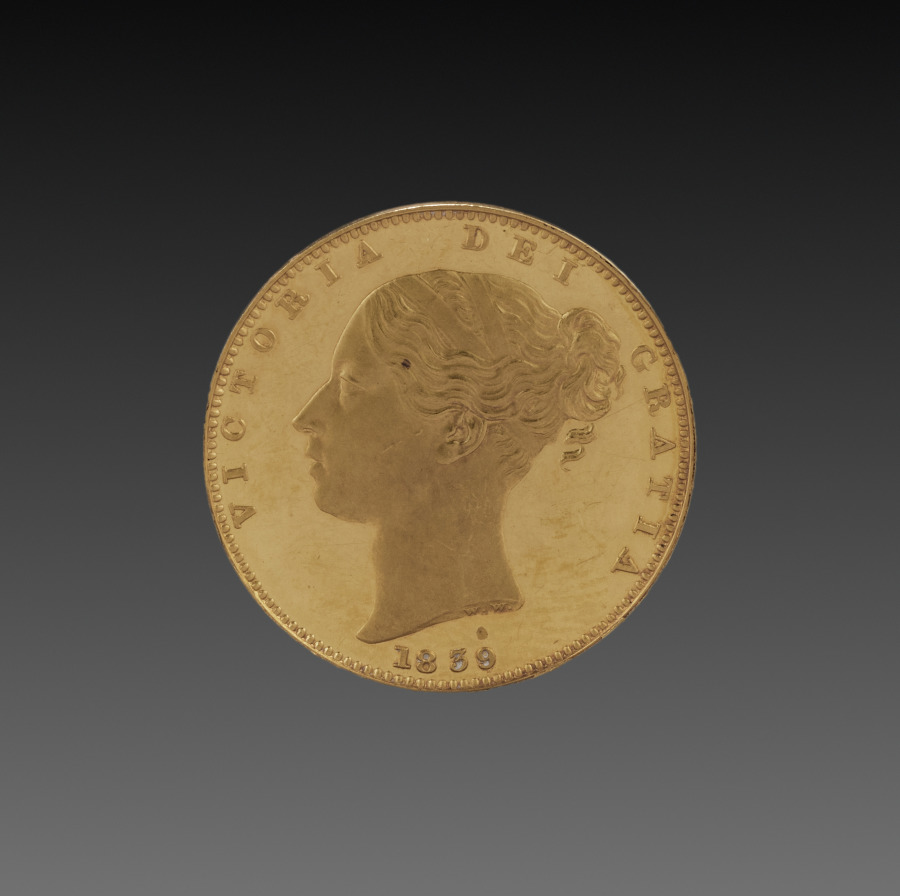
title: Sovereign: Victoria (obverse)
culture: England, Victoria, 1837-1901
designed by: William Wyon (British, 1795–1851)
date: 1839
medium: gold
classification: Coins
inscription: VICTORIA DEI GRATIA; below: 1839.